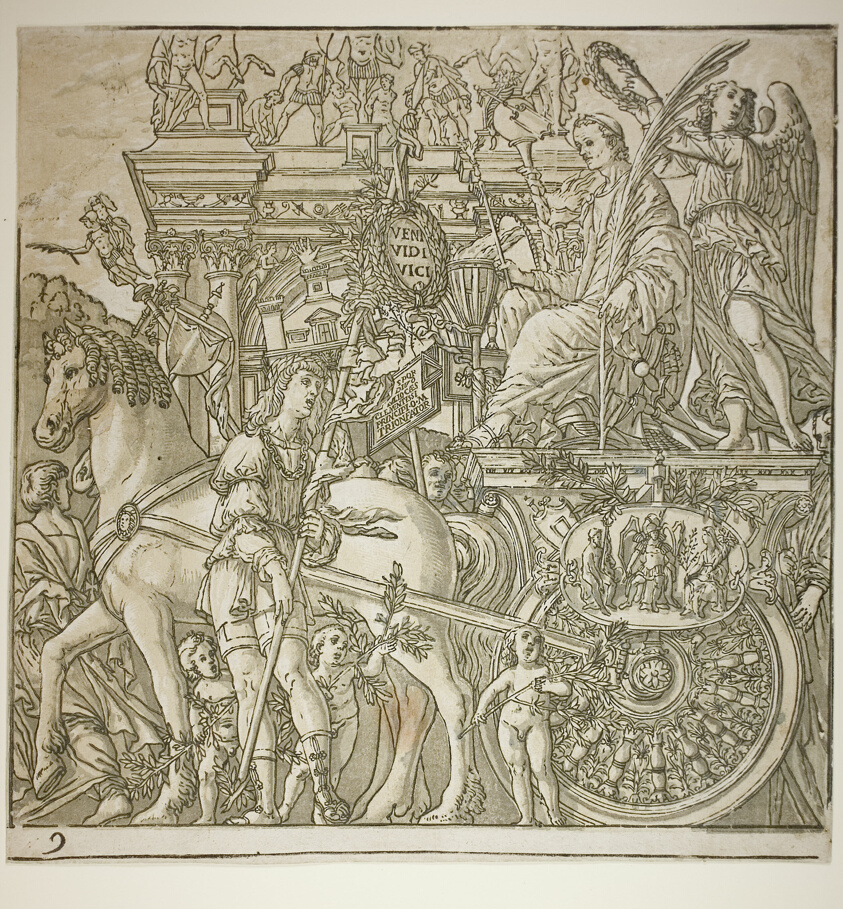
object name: Print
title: Triumph of Caesar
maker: Andrea Andreani (Italian, 1558/59-1629); after Andrea Mantegna (Italian, 1431-1506)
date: 1599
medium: Chiaroscuro woodcut from four blocks in black and light, medium and dark greenish gray on off-white laid paper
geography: Italy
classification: chiaroscuro woodcut; woodcut; print; prints and drawing